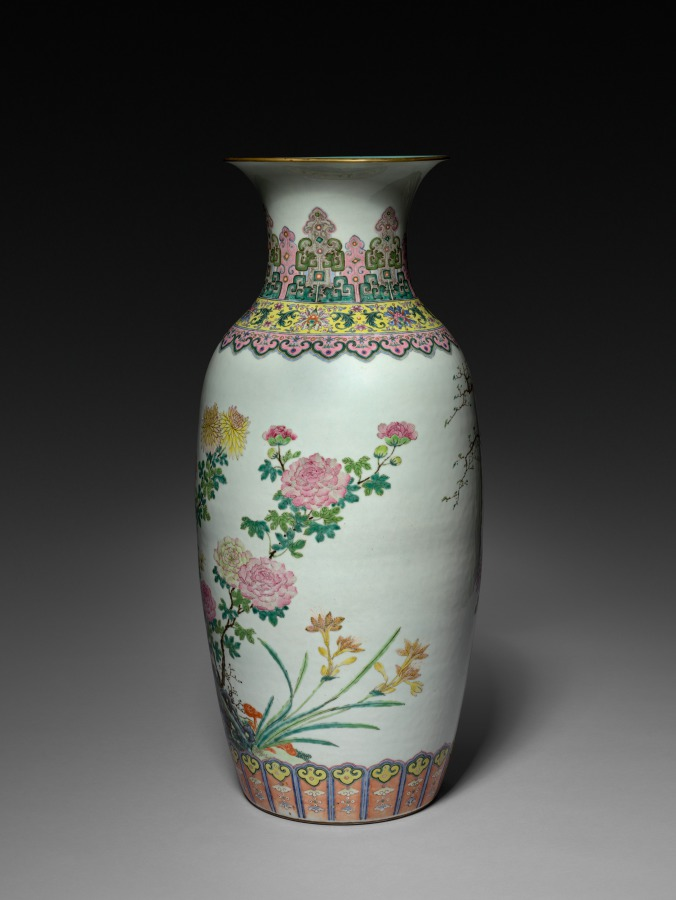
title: Vase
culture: China, Qing dynasty (1644–1911), Qianlong reign (1736–95)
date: 1736–95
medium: porcelain with famille rose overglaze enamel decoration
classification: Ceramic